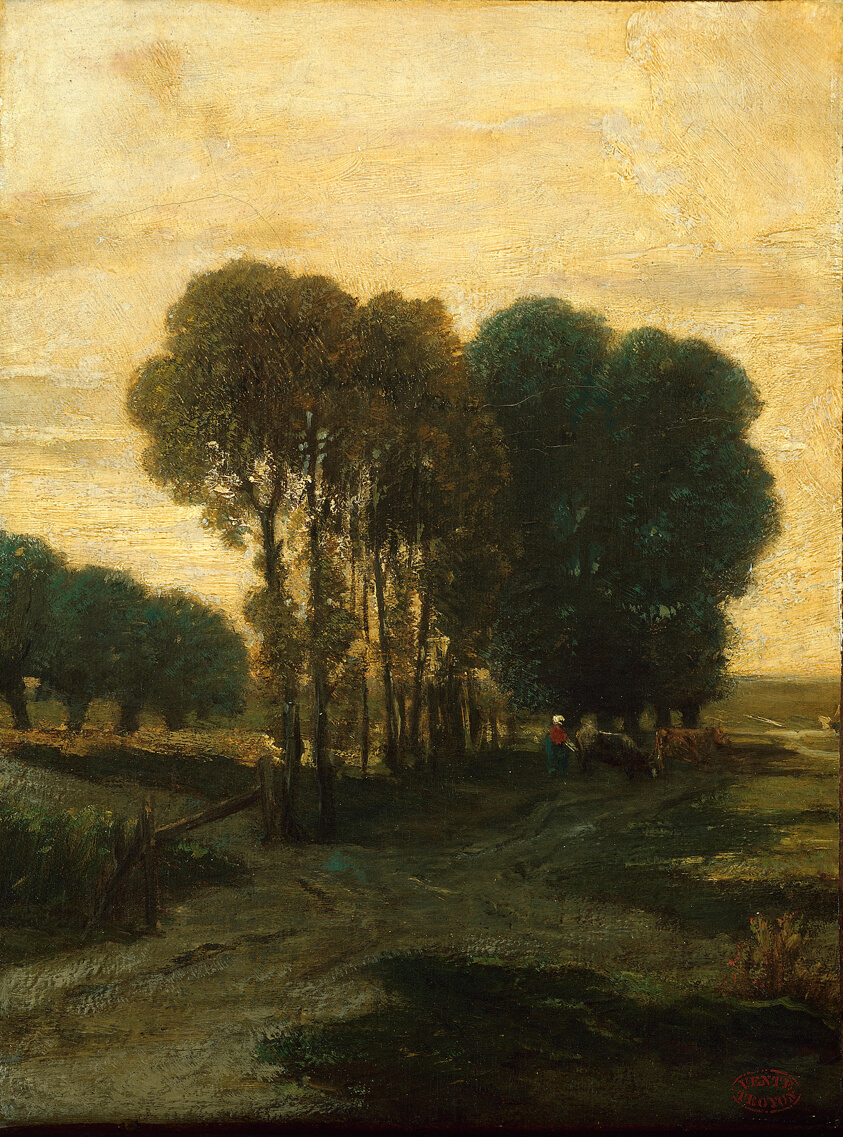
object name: Painting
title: A Clump of Trees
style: nineteenth century, 19th century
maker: Constant Troyon (French, 1810–1865)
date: c. 1860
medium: Oil on canvas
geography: France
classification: oil on canvas; paint; oil paintings (visual works); french; painting; european painting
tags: trees, landscape, landscapes, nature, road, paths, animals, cows, figures, figure